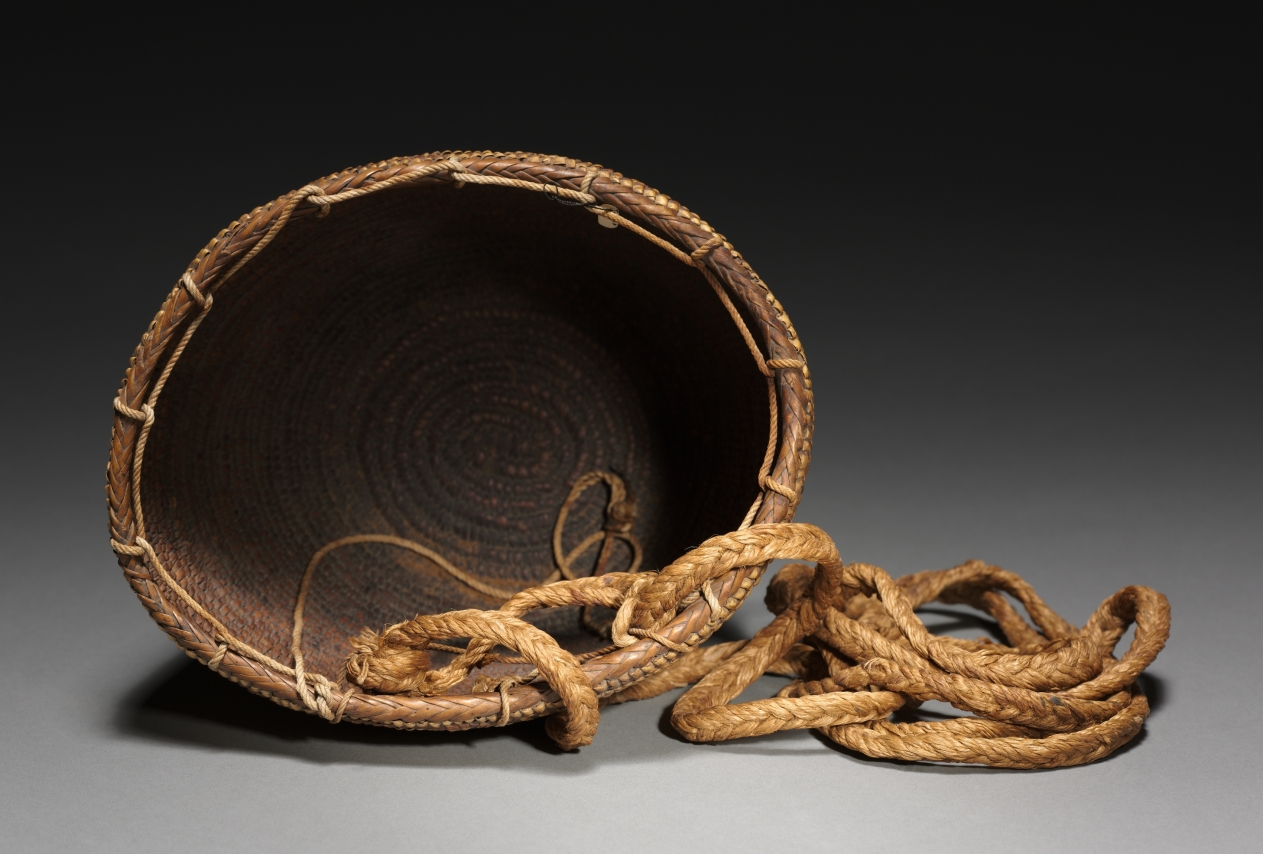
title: Berry Basket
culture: Northwest Coast, coastal, Salish, late 19th century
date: 1890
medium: woven, imbricated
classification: Basketry